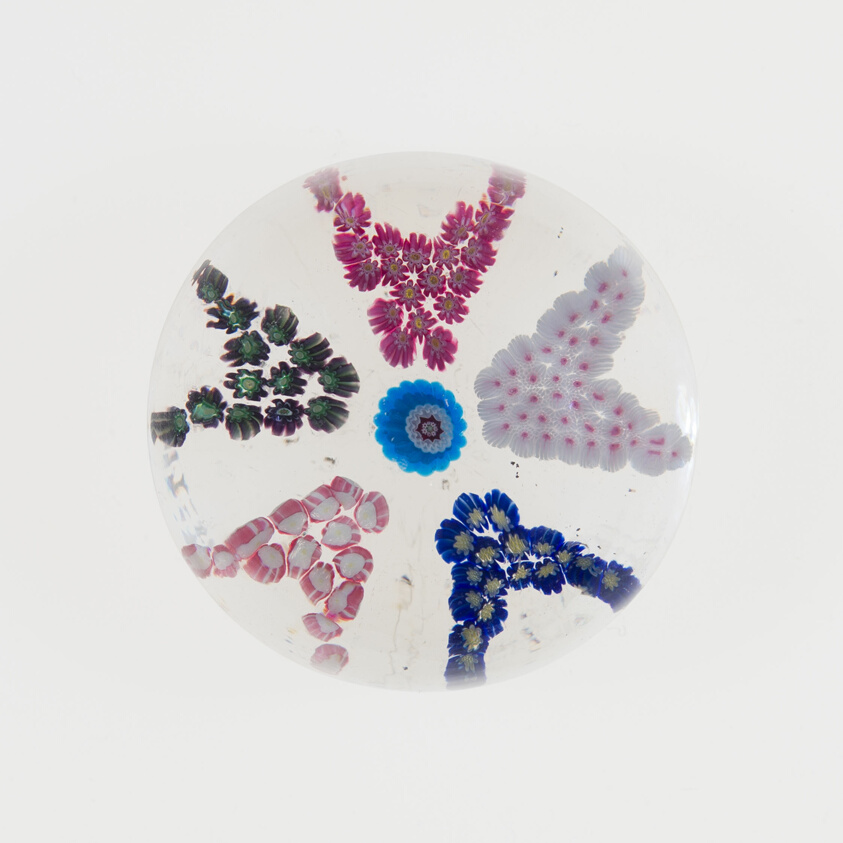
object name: Glass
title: Paperweight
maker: Clichy Glassworks (Cristalleries de Clichy); Clichy, France, 1837-1885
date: 19th century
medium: Glass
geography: Clichy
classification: paperweight; millefiori; european decorative arts; glass